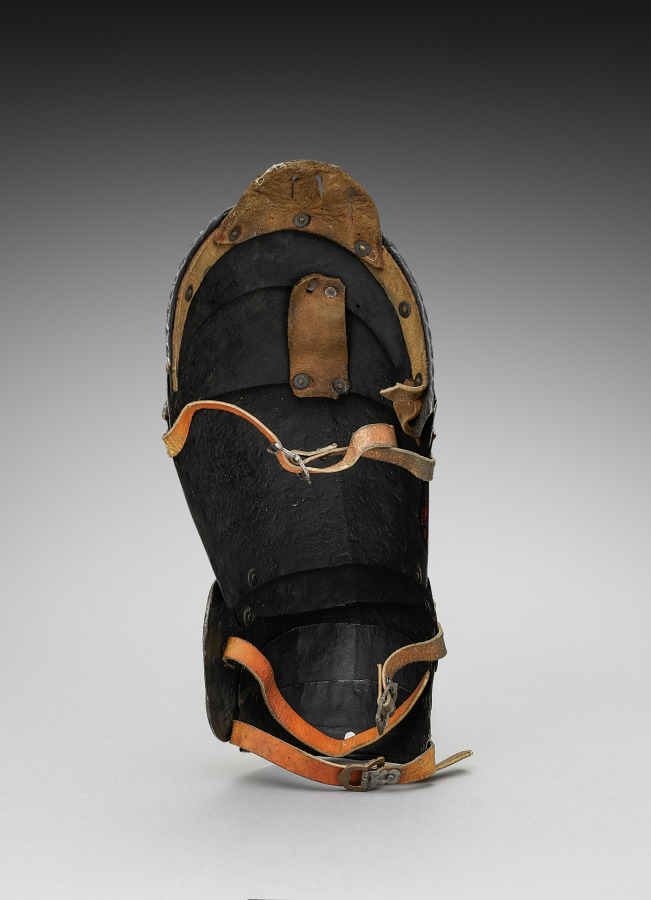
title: Left Cuisse with Poleyns (knee-cops)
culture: Germany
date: c.1550–1570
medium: iron, steel, leather and brass rivets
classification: Arms and Armor